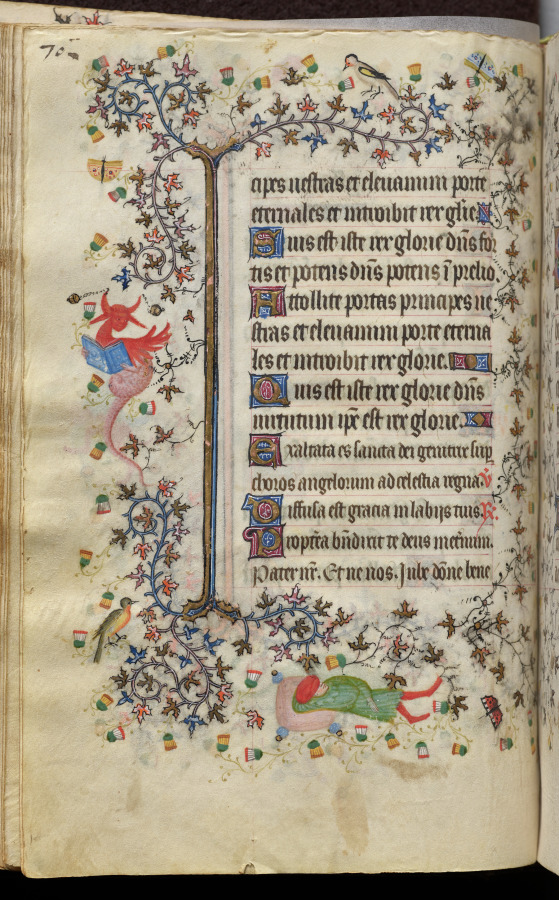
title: Hours of Charles the Noble, King of Navarre (1361-1425): fol. 35v, Text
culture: France, Paris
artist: Master of the Brussels Initials and Associates (French)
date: c. 1405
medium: ink, tempera, and gold on vellum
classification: Bound Volume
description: This precious volume was obviously highly prized by its owner, the French-born King of Navarre, who had his coat of arms painted on no less than twenty folios. Rather than directly commissioning this manuscript from a specific workshop, it seems that Charles the Noble acquired his book of hours -- perhaps ready-made for the luxury market -- while on a trip to Paris in 1404-05. A collaborative effort, six painting styles are evidenced within the pages of this codex, those of two Italians, two Frenchmen, and two Netherlanders. The painter who was responsible for the planning and decoration of the book, and who produced seventeen of the large miniatures, was a Bolognese artist known as the Master of the Brussels Initials. His principal assistant, responsible for most of the borders, was a Florentine who signed his name "Zecho" da Firenze on folio 208 verso.